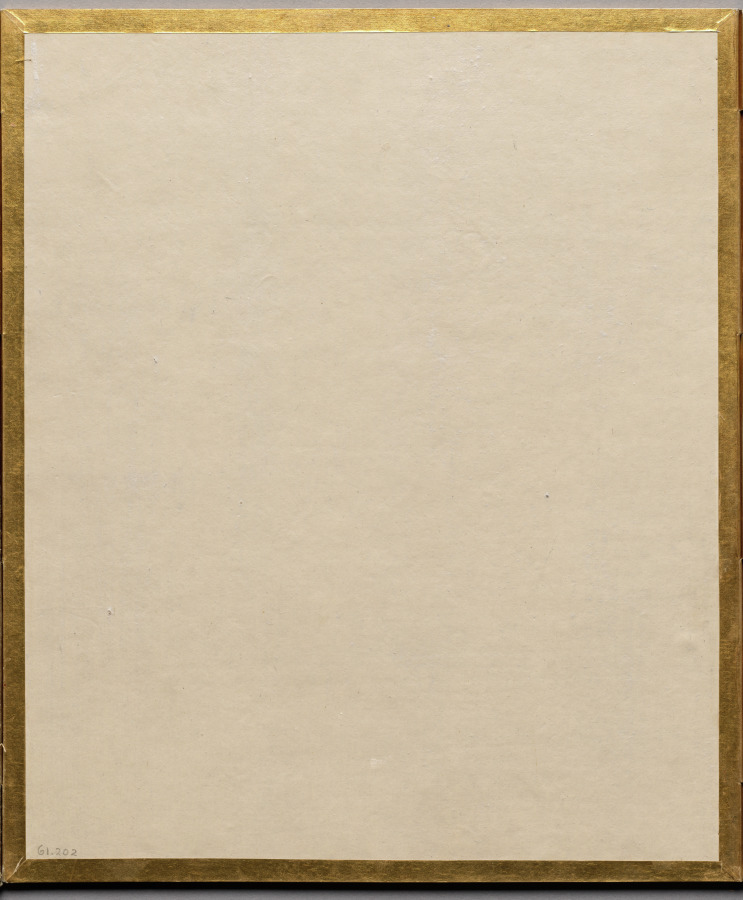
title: Album of Illustrations for the Tale of Genji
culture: Japan, Edo period (1615–1868)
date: 1600s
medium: Double-sided accordion-style album of 17 leaves; ink, light color, and gold on paper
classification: Bound Volume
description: This album contains illustrations for the classic literary work the Tale of Genji, authored in the 1000s by Murasaki Shikibu, an aristocrat of the Heian period (794–1185) court. The scenes are painted in the “white drawing” (hakubyō) mode, in which a fine ink line is used to depict figures and spaces with great subtlety, punctuated only occasionally by traces of red pigment for a character’s lips, a detail of a garment, or a decorative element. These two scenes illustrate episodes from the chapters “Thin Veil of Cloud” (Usugumo) and “Barrier Gate” (Sekiya).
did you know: The illustrations are identified by chapter title in cartouches to the upper right of the paintings.